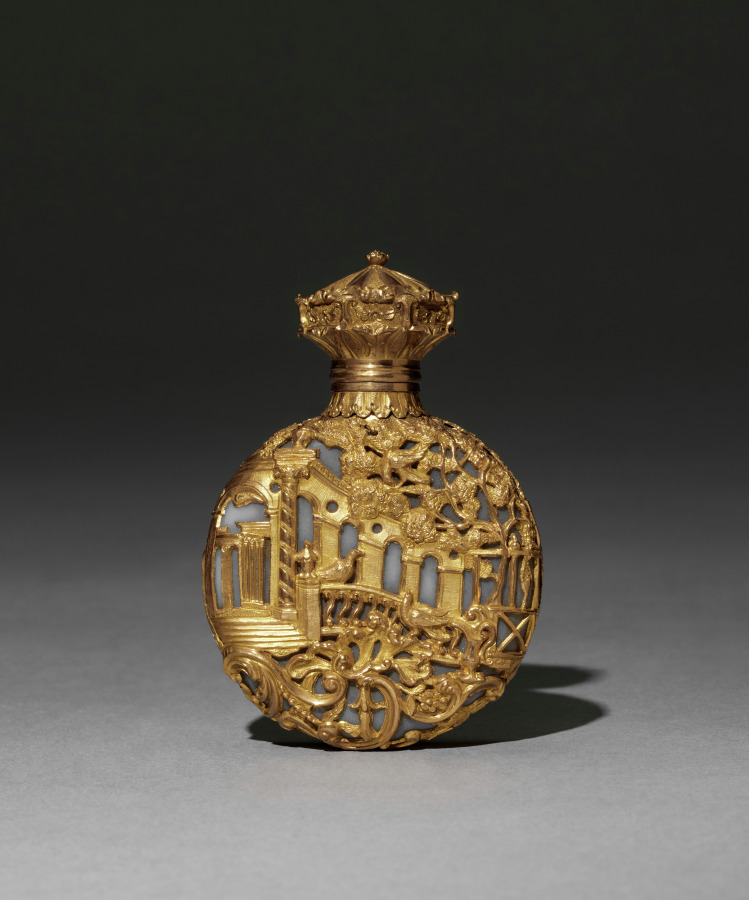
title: Scent Bottle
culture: Germany (?)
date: 1800s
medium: blue-gray opaline glass mounted in gold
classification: Miscellaneous